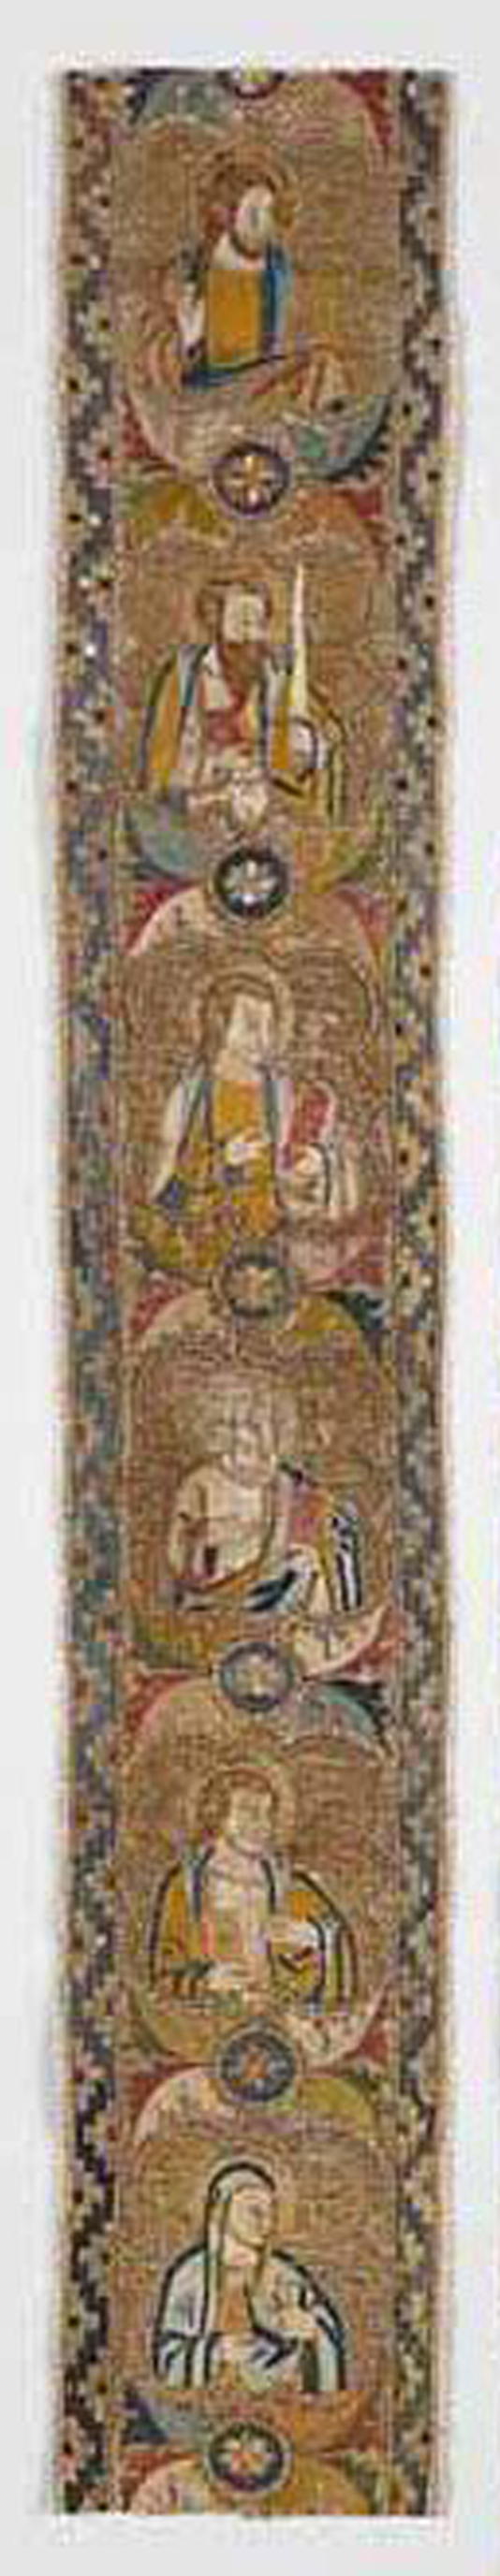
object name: Religious/Ritual Object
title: Band from an Orphrey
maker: Italy, Florence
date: 1360s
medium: Linen, plain weave; underlaid with linen, plain weave; embroidered with silk, gilt- and silvered-metal-strip-wrapped silk in split and surface satin stitches; laid work, couching, and padded couching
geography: Florence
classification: textile; needlework (visual works); liturgical; ritual objects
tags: religious scenes